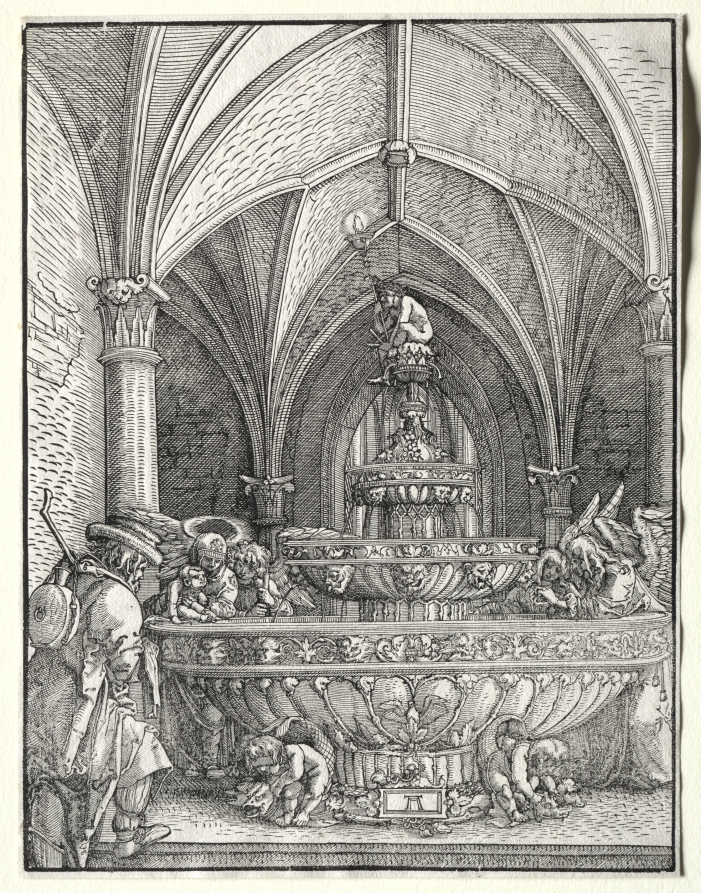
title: The Holy Family on the Flight into Egypt at a Fountain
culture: Germany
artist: Albrecht Altdorfer (German, c. 1480–1538)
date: c. 1520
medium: woodcut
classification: Print